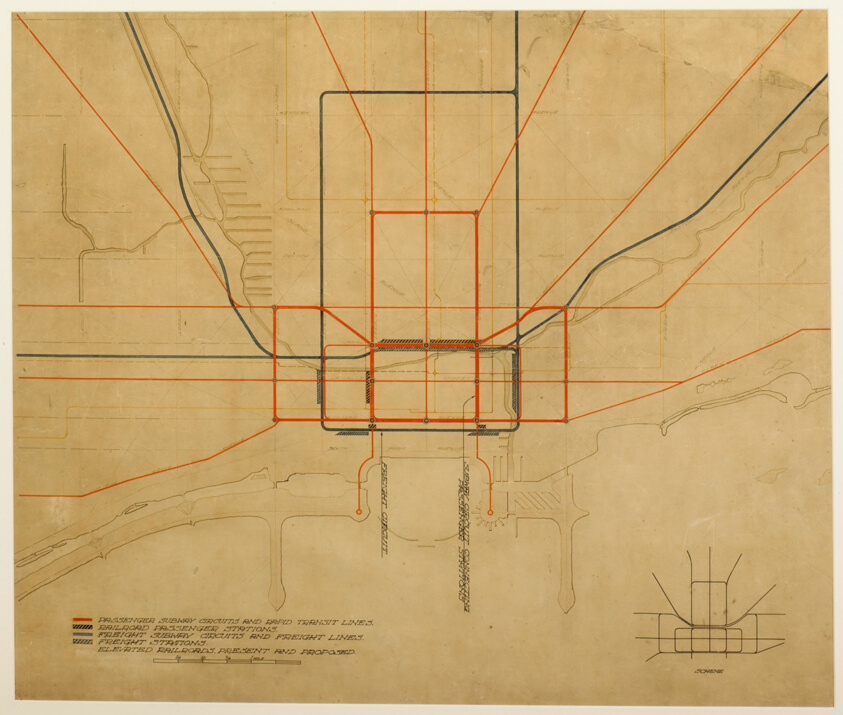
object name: Architectural Drawing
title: Plate 75 from The Plan of Chicago, 1909: Chicago. Diagram of the City, Showing Complete System of Inner Circuits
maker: Daniel Hudson Burnham, American, 1846-1912; Edward Herbert Bennett, American, born England, 1874-1954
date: 1909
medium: Colored ink on a printed map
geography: Chicago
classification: architectural drawing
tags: Chicago, architecture